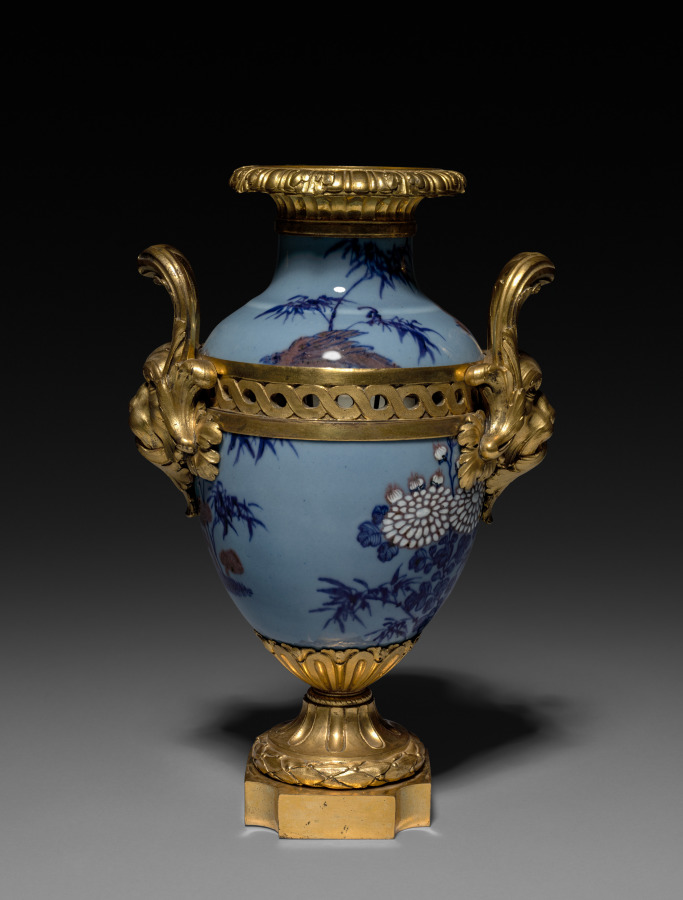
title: Garniture Set (one clock and 2 vases)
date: 1736–1770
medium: Chinese hard-paste porcelain, gilt bronze, enameled metal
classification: Furniture and woodwork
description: The fascination with Chinese porcelain among aristocratic circles increased during the reign of Louis XV. In reaction to the perceived excesses of elaborate naturalistic ornament of the 1750s, mount makers increasingly turned to neoclassical designs, known as Goût Grec (Greek taste) in the 1760s and 1770s. These beautifully chased gilt-bronze mounts feature classical Greco-Roman motifs such as lion masks, acanthus and laurel leaves, and pilasters.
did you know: A set of vases and clock, connected visually by the use of the same materials, often adorned a mantlepiece or the top of a large piece of furniture, such as a commode or console, within a room.